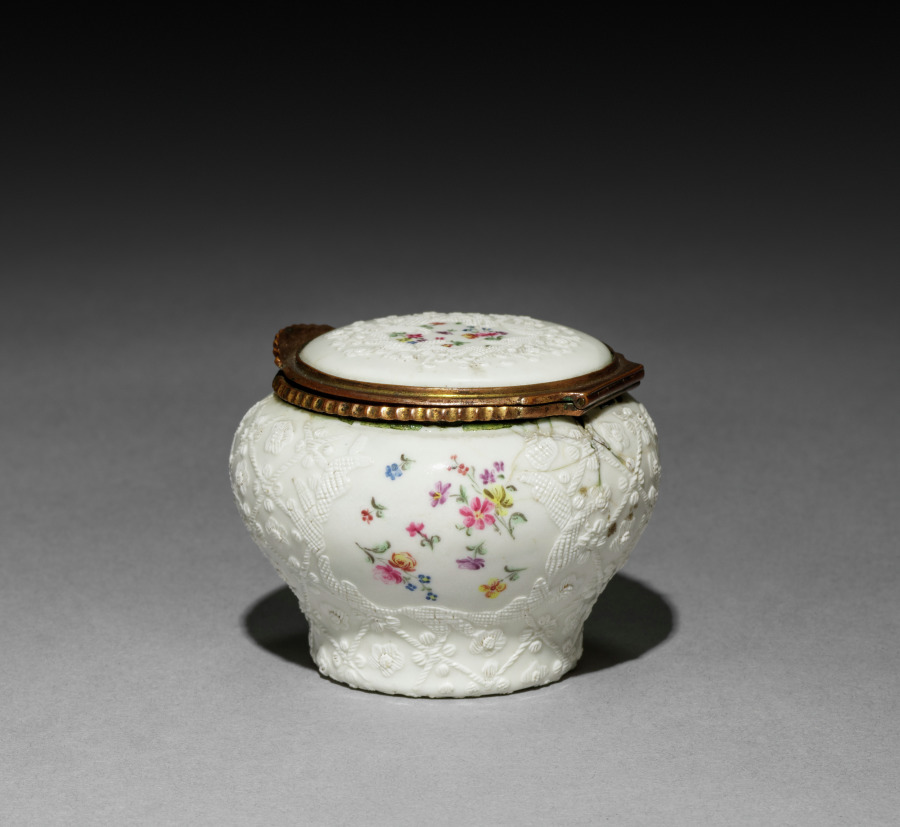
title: Box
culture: England, Staffordshire, 18th century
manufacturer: South Staffordshire Factory (British)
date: c. 1770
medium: enamel on copper with metal mounts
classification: Miscellaneous